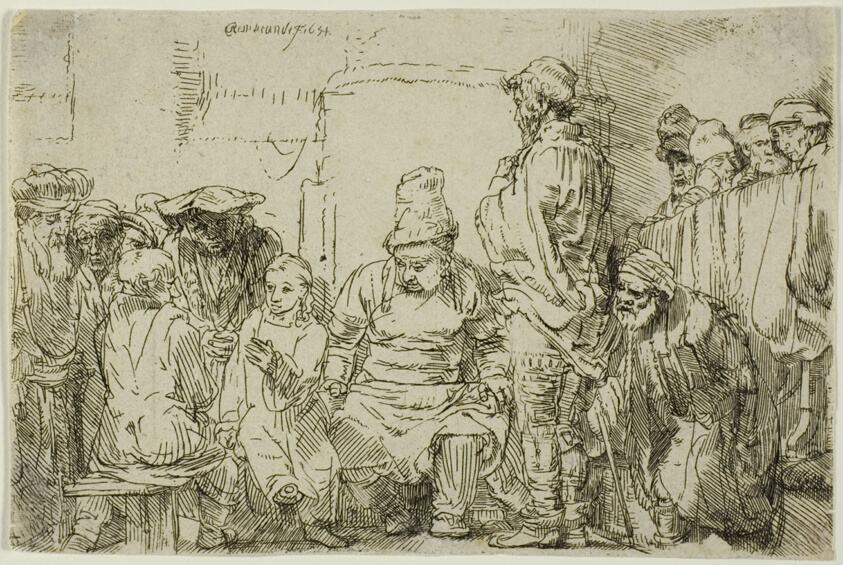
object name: Print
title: Christ Seated Disputing with the Doctors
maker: Rembrandt van Rijn (Dutch, 1606-1669)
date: 1654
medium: Etching on paper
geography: Holland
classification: etching; print; prints and drawing; paper